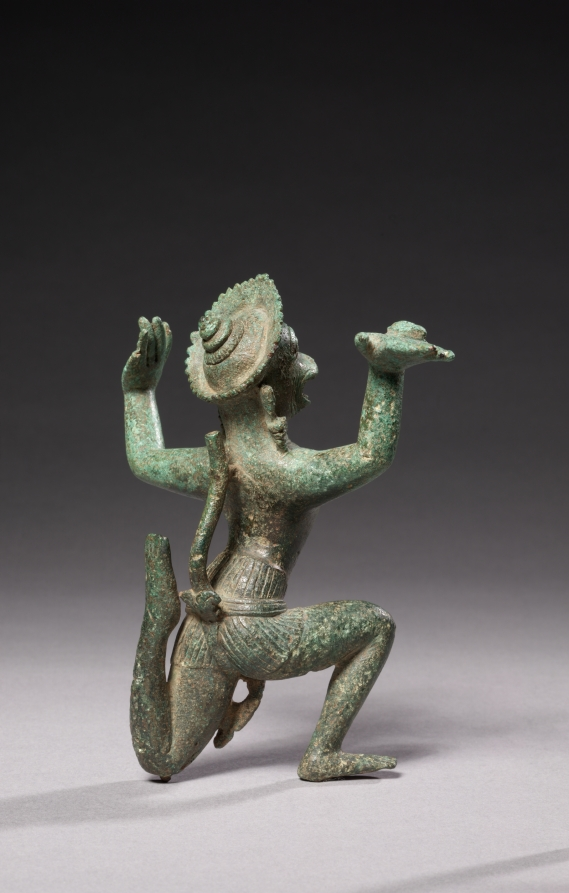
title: Flying Hanuman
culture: Cambodia, Koh Ker style, 10th century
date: 900s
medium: bronze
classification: Sculpture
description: Hanuman is most prominently featured in the Indian epic Ramayana, which had gained popularity in Cambodia by the 600s. In a dramatic scene from the epic, Hanuman, who is able to fly, raises his left hand in a gesture meaning "Fear not!" In his raised right hand he carries an antidote to a poison that has rendered the hero Rama and his brother paralyzed and dying. This antidote from the Himalaya Mountains will restore them to full vigor so that they will be able to win the war against the demons and rescue Rama's wife Sita. The garment's wide parallel pleat lines, the swinging flared swath between his legs, the tiered conical crown, and the broad volumes of the chest are stylistic hallmarks of Khmer art of the tenth century.